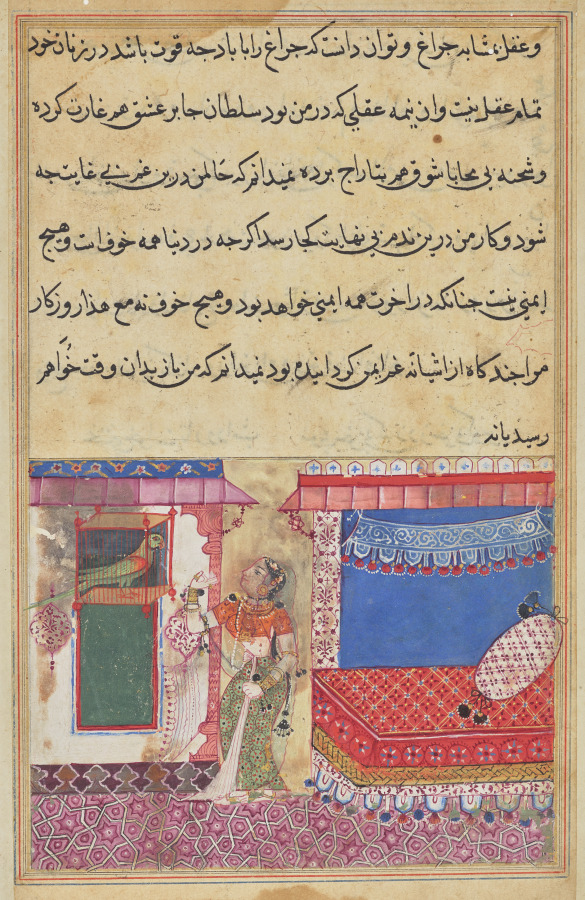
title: The Parrot Addresses Khujasta at the Beginning of the Eighteenth Night, from a Tuti-nama (Tales of a Parrot)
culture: Mughal India, court of Akbar (reigned 1556–1605)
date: c. 1560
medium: gum tempera, ink, and gold on paper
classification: Painting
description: When like a red-turbaned king the sun disappeared under the canopy in the west and like a silver-robed monarch the moon appeared on the throne in the east, Khujasta went to ask Tuti’s permission to leave. The parrot replied that his mistress Khujasta should devote herself to her obligations of propriety, just like the three extraordinary companions of the prince. Her interest piqued, Khujasta asked Tuti to tell her about them. He then launched into a story about the benefits of loyalty and generosity that lasted all night.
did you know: The medallion pattern of Khujasta’s skirt is a convention of an earlier painting style